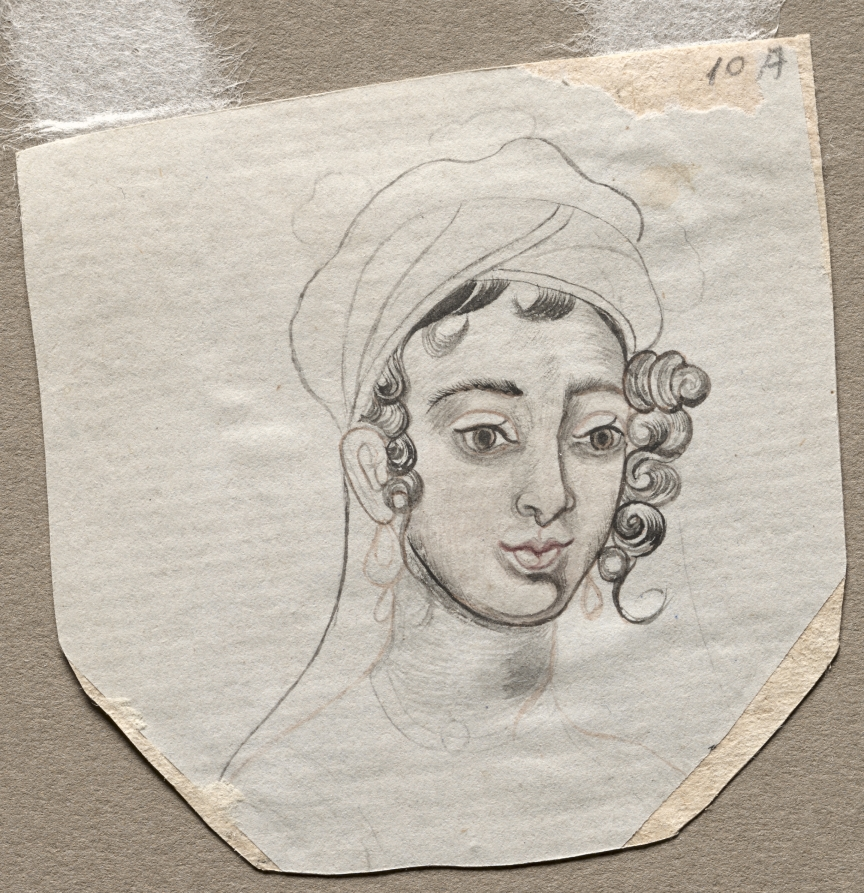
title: Head of a Young Man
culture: India, Company School, Sangram Singh seal on reverse, early 19th century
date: early 1800s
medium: drawing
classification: Drawing